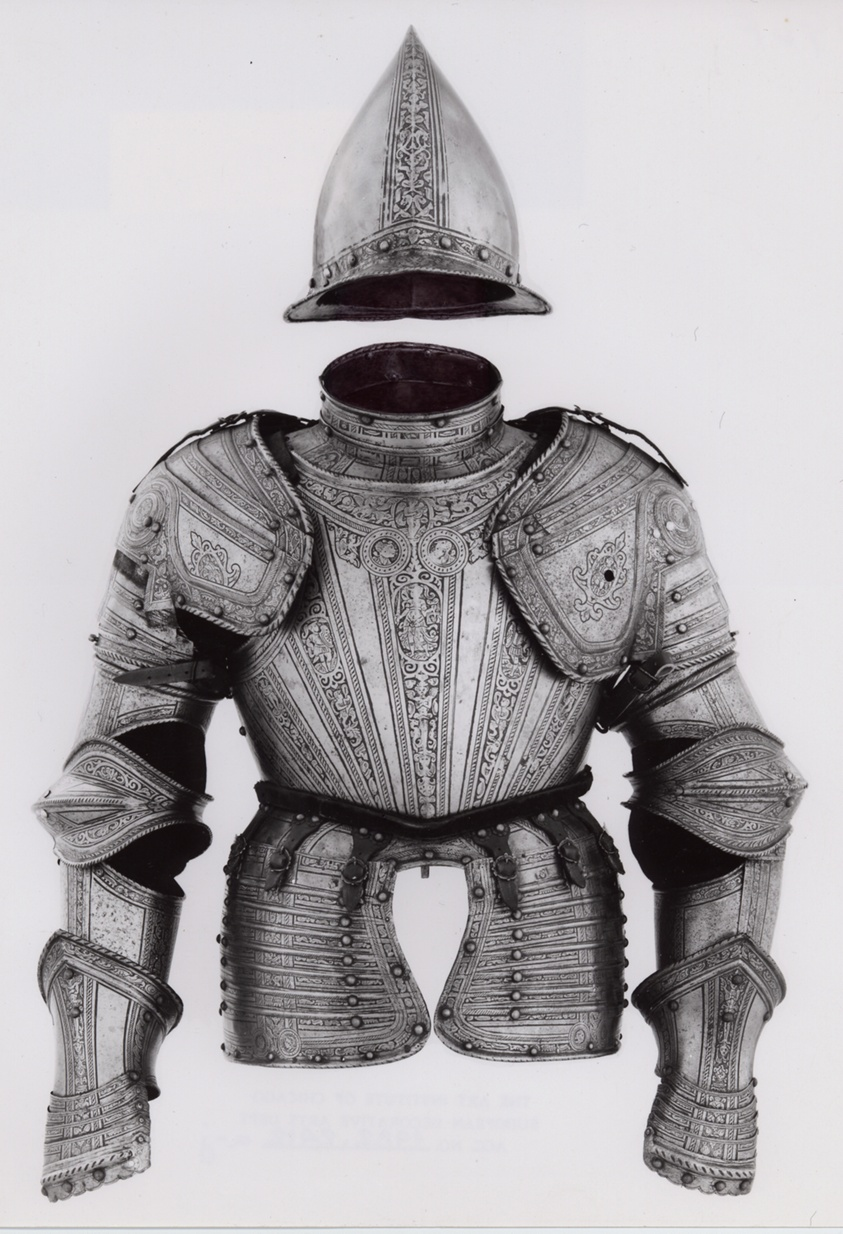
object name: Armor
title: Half Armor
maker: Italian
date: c. 1560/70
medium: Steel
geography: Italy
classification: suit; armor; arms and armor